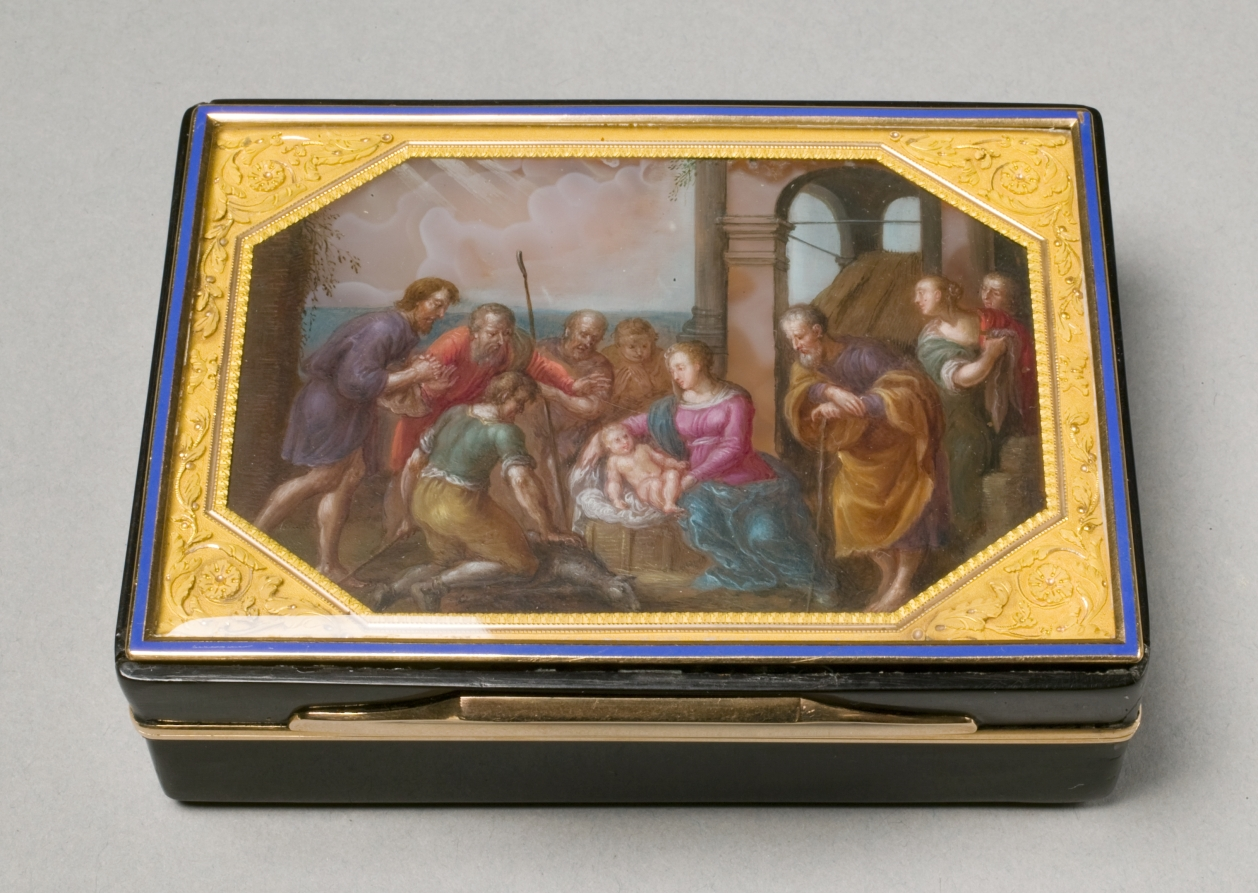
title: Snuff Box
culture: France, Paris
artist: Pierre-André Montauban (French)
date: c. 1810–20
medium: gold-mounted tortoiseshell, agate, enamel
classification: Miscellaneous